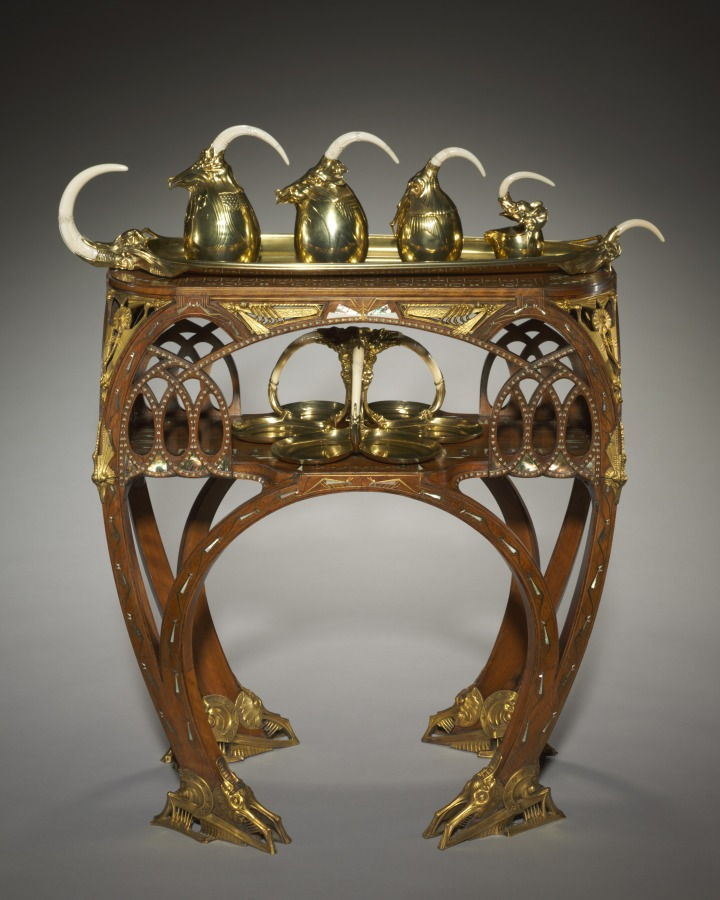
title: Tea Table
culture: France, Paris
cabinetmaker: Carlo Bugatti (Italian, 1856–1940)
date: c. 1907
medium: inlaid wood (mahogany?), cast and gilded bronze mounts, inlays of ivory or bone, metal, and mother-of-pearl (marine mussels or pearl oysters)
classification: Furniture and woodwork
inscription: signed in ligature in white metal inlay on central shelf: Bugatti.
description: Luxurious materials might catch the eye first, but a closer look reveals the imaginary creatures that adorn the surface of this table. Featuring elaborate arches, a favorite motif that appeared throughout Bugatti's furniture, this fantastical imagery is a window into the designer's expressive imagination.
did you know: Carlo Bugatti's sons achieved illustrious careers of their own. Rembrandt Bugatti (1884-1916) became a celebrated sculptor, and Ettore Bugatti (1881-1947) manufactured luxurious automobiles and racing cars.